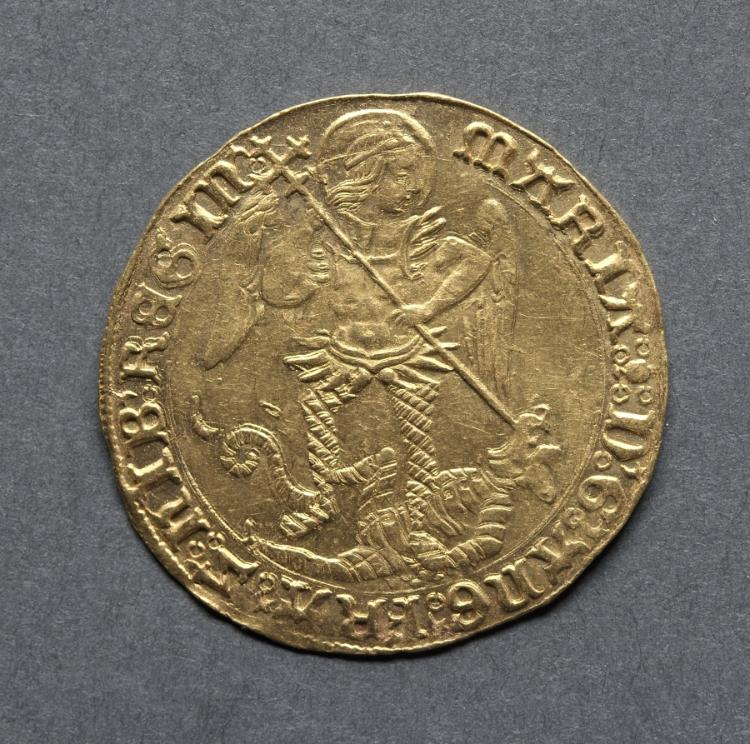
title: Angel: An Angel Slaying a Dragon (obverse)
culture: England, Mary, 1553-1554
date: 1553–1554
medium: gold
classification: Coins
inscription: MARIA D G ANG FRA Z HIB REGIN